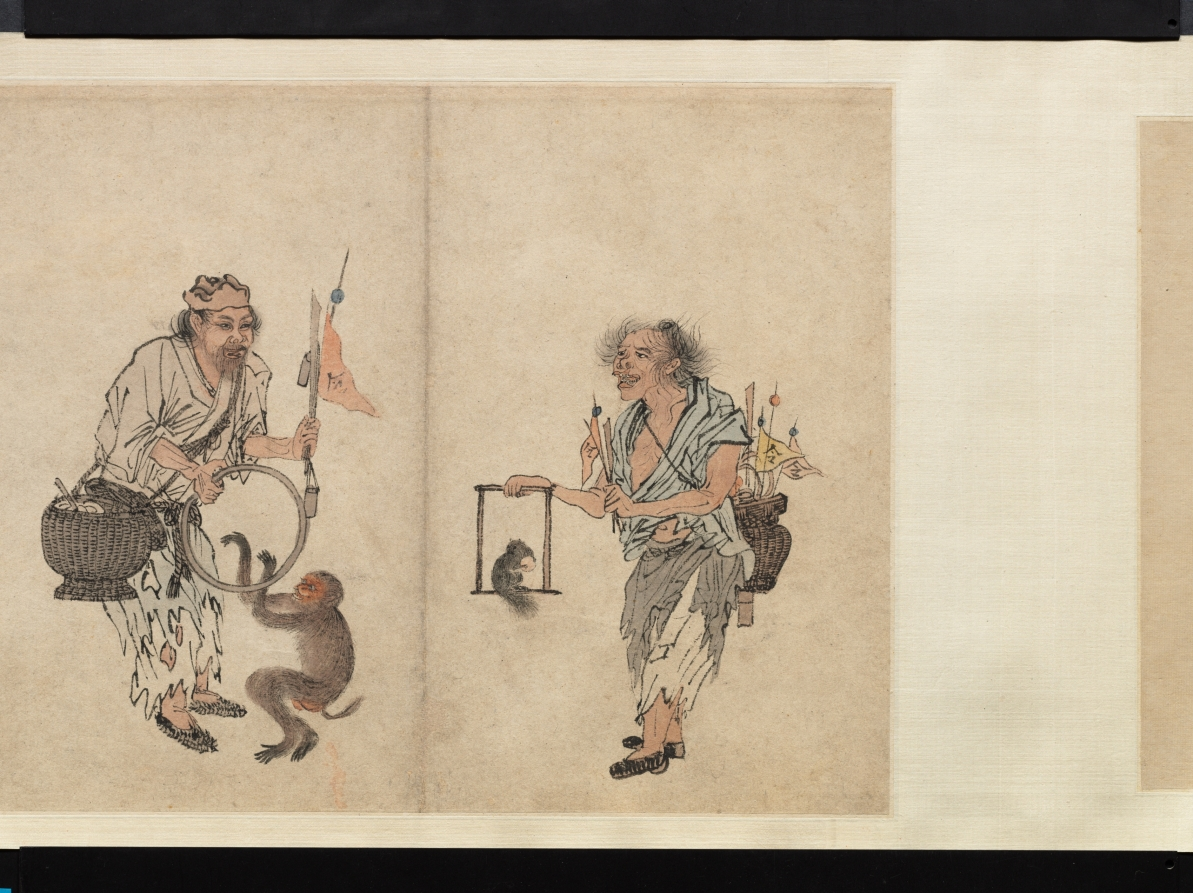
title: Beggars and Street Characters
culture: China, Ming dynasty (1368–1644)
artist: Zhou Chen (Chinese, c. 1450–c. 1536)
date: 1516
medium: Handscroll; ink and light color on paper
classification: Painting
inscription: 題: 周臣流氓圖. 古堇趙鶴琴 [印] 老鶴臨池; 鵝池軒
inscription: 正德丙子秋七月，閒窗無事 ，偶記素見市道丐者種種態度。乘筆硯之便，率爾圖寫。雖無足觀，亦可以助警勵世俗云。 東邨周臣記 [印]東邨; 舜卿; 鵝場散人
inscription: 吳中東邨周君，善丹青，尤長於人物。此圖其所見盛市丐者之狀種種，各盡其態，觀者絕倒。嗟乎，今之晝夜乞哀以求富貴者，安得起周君而貌之耶。臥雲徵君出示，余漫題其後。 甲子歲十月吳門黃姬水 [印] 士雅山人; 另一印不詳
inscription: 是冊凡數種。其飢寒流離疲癃殘疾之狀，種種之異。觀此而不惻然心傷者，非仁人也。計正德丙子逆瑾之流毒已數年。而[江]彬 [錢] 寧輩肆虐方熾。意分符剖竹諸君，亦鮮有能撫字其民者。然則舜卿此作，殆與鄭君 流民圖同意。其有補於治道者不淺，要不可以墨戲忽之也。 長洲張風翼題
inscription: 東村此筆，蓋圖寫飢寒乞丐之態，以警世俗耳。而質山 [黃姬水]欲其寫昏夜乞哀，而靈墟[張鳳翼]則擬之於安上門圖。二君之見，其各有所指哉。昔唐六如每見周筆，輒稱曰：周先生！蓋深服其神妙之不可及。若此冊者，信非他人可能而有符於六如之心伏矣。豈易得耶。若黃、張之指，則又論於畫之外，不在於形似筆墨之旨也。 萬歷丁丑十二月三日 茂苑文嘉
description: Zhou Chen from Suzhou provides rare depictions of impoverished people that once filled the city’s markets and streets. Despite Suzhou’s prosperity, its rapid growth polarized society, including the wealthy and those who had deserted their farmlands, who were without homes, unemployed, or sick. Amid these are figures who inspire fear rather than empathy. The painting may thus be informed by local practices at the end of the lunar year, in which street beggars, in exchange for food or money, would dress up like ghosts and demons to drive out evil forces.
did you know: Although Zhou Chen's original composition was an album of 24 figures, today it is mounted as two handscrolls, one in the Cleveland collection and one in the Honolulu Museum of Art.